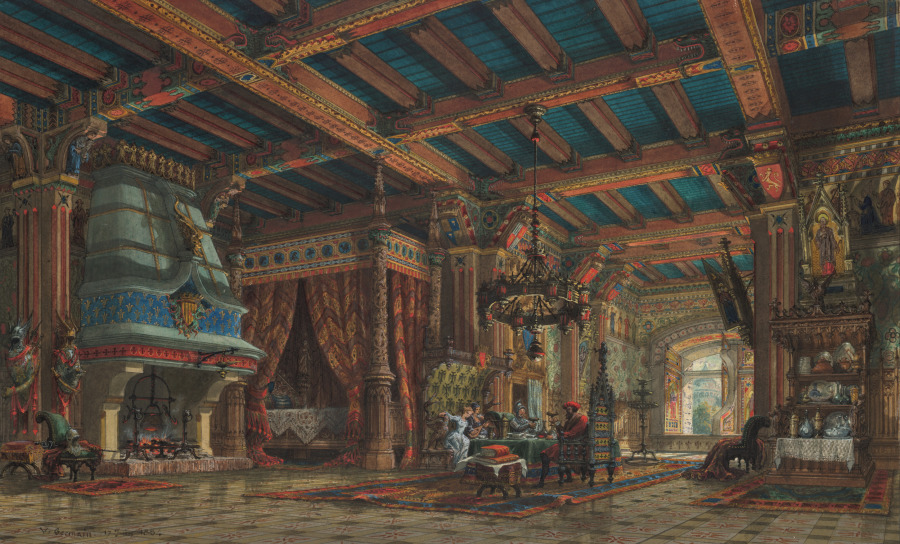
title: Château Interior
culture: France, 19th century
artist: V. Germain (French)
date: 1834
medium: pen and ink, watercolor, gouache with graphite underdrawing on heavy cream wove paper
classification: Drawing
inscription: signed and dated, lower left, in black ink: “V. Germain 17 Juin 1834”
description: Little is known today about V. Germain, the artist who produced this drawing. Here, he focused on an interior scene with exacting detail, using a small group of figures at the sheet’s center to emphasize the massive scale of the castle where they have gathered.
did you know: Germain focused on a variety of textured fabrics and luxury materials in this depiction of a castle interior.